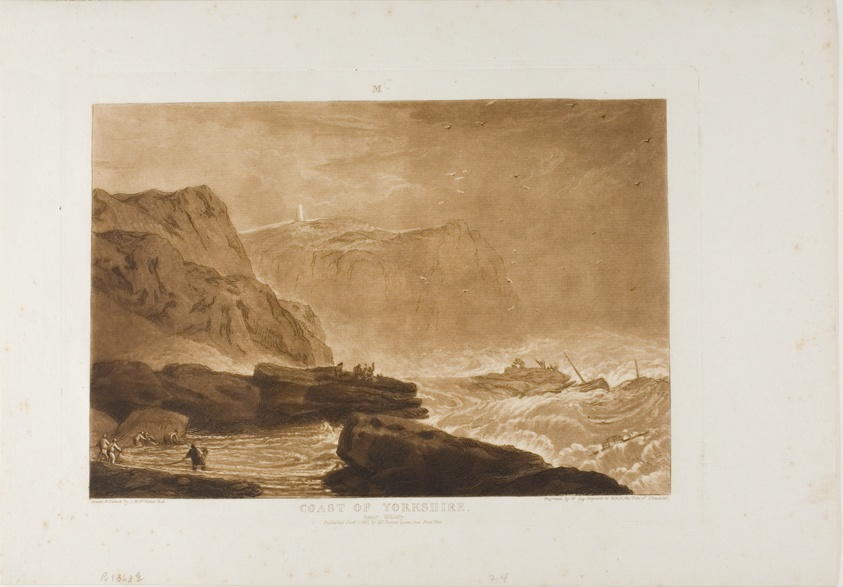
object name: Print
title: Coast of Yorkshire, plate 24 from Liber Studiorum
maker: Joseph Mallord William Turner (English, 1775-1851); Engraved by William Say (English, 1768-1834)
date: published January 1, 1811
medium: Etching and engraving in brown ink on ivory wove paper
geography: England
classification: etching; print; prints and drawing